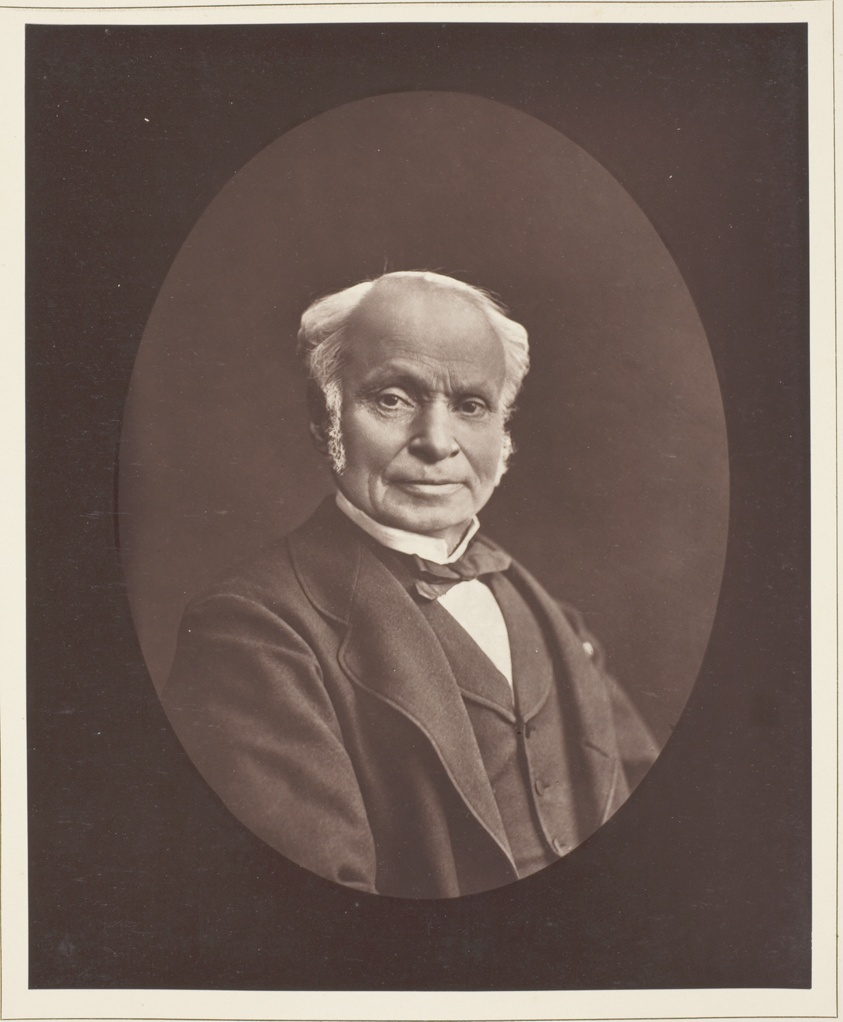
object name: Photograph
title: Charles-Camille Doucet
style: 19th century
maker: Goupil et Cie; French, active after 1855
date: c. 1880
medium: Woodburytype, from the periodical “Galerie Contemporaine Littéraire, Artistique”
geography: France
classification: woodburytype; photomechanical process; photography; photograph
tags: Collected by Hugh Edwards, Paris, Contemporaine Littéraire